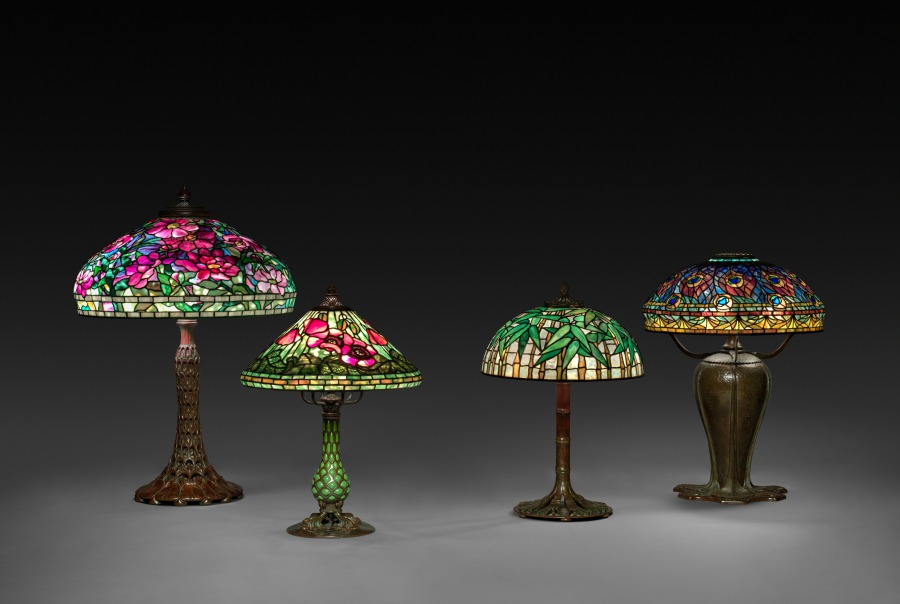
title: Bamboo Table Lamp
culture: America, New York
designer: possibly by Clara Wolcott Driscoll (American, 1861–1944)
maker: Tiffany Studios (United States, New York, 1902–32)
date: c. 1902–10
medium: Leaded glass, bronze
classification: Lamp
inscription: Shade impressed: TIFFANY STUDIOS NEW YORK 1443-14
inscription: Base impressed: TIFFANY STUDIOS/NEW YORK/480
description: Louis Comfort Tiffany was among those who championed lush, sometimes wild-looking displays of varied species in the garden at his Long Island estate, Laurelton Hall. He encouraged his designers to take inspiration from his garden by shipping fresh cuttings almost weekly to his studios. Ohio native Clara Wolcott Driscoll and her team of female designers created floral and leafy patterns for lamps and mosaics that became among the most sought after and commercially successful of Tiffany’s production.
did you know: Although many of Louis Comfort Tiffany's lamp shades were interchangeable with different bases, this bamboo shade was made to match its bamboo style base.